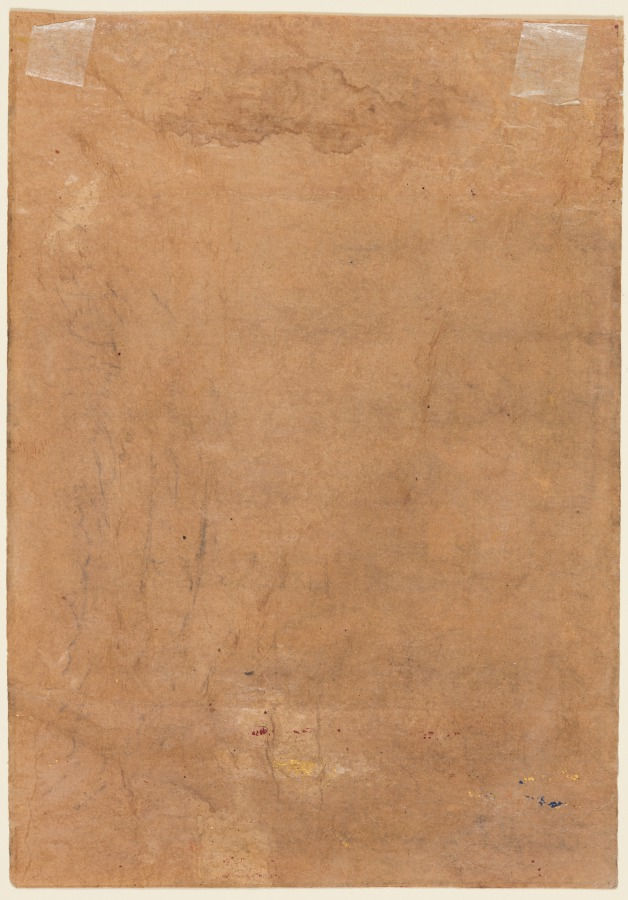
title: A King Making Love in the Harem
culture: Northwestern India, Rajasthan, Rajput Kingdom of Jaipur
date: c. 1720–30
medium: gum tempera and gold on paper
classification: Painting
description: From a series of paintings valorizing the virility of the ruler, this scene of lovemaking is set in the lavish interior space of the palace women’s quarters. Mauve floral carpet, gold lattice window, and vessels for wine and breath-freshening paan enhance the scene. The marble walls with gold flowering plants and niches appear gray in the dim evening light.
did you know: Two illuminated panels at top and bottom are decorated with gold and lapis lazuli.